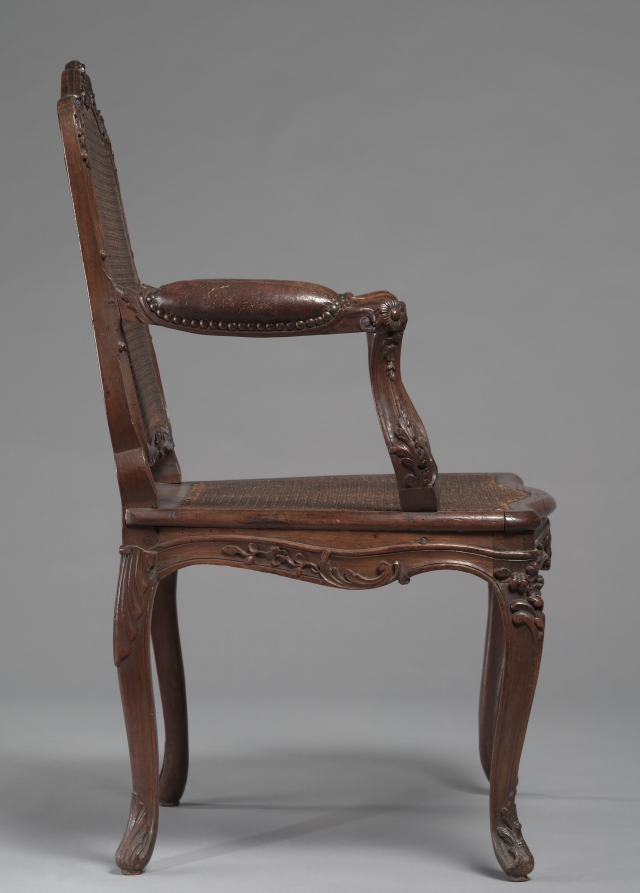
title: Armchair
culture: France, 18th century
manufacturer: René Cresson (French, c. 1705–c. 1749)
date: c.1740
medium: carved wood, cane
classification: Furniture and woodwork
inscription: signed underneath on strip across back: "CRESSON LAINE" (the trademark for René Cresson).